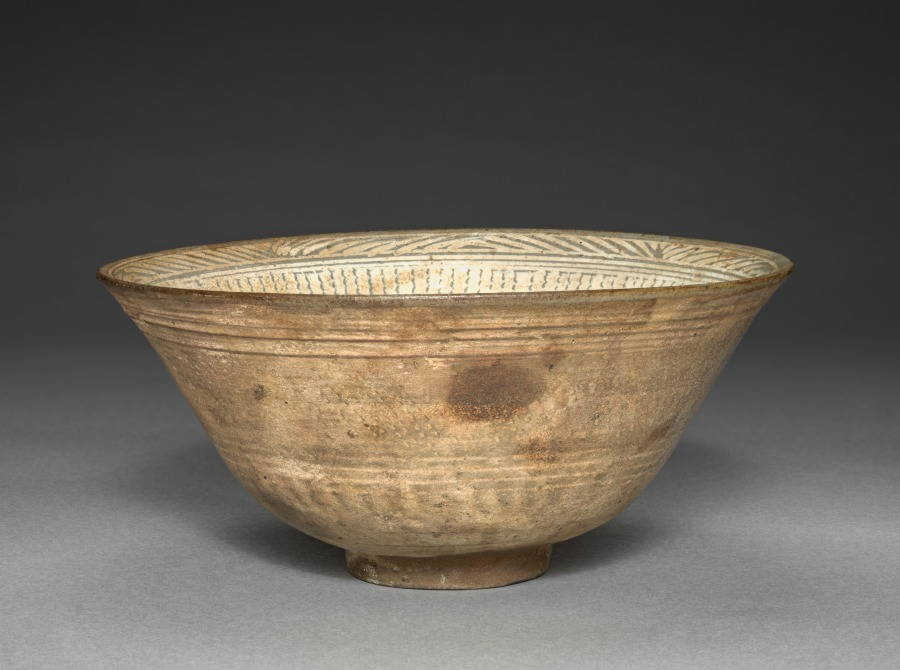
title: Bowl with Stamped Floral Decoration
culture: Korea, Joseon dynasty (1392–1910)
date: 1600s–1700s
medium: glazed ceramic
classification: Ceramic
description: This type of wide-mouthed bowl was used everyday in Korea, not exclusively for tea drinking. But when it was introduced to Japan around the early 16th century, its imperfect appearance evoking the aesthetics of wabi-sabi caused it to be repurposed as tea bowls in Japan. Possibly produced in one of the kilns established by the trading office (Waegwan) in Busan, southern Gyeongsang province, this type of bowl was sold to Japanese elite collectors.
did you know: This type of humble tea bowl was highly praised among Japanese collectors for its imperfect beauty.